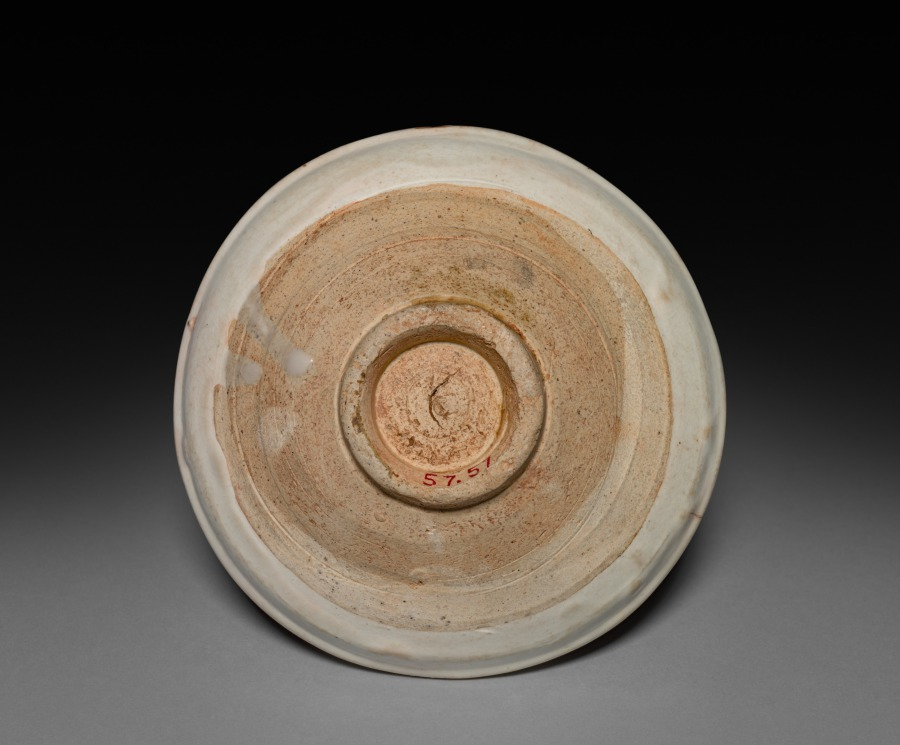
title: Cup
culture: China, Jin dynasty (1115-1234)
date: 1100s–1200s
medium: buff stoneware with underglaze slip application and overglaze enamel decoration, Cizhou ware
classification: Ceramic